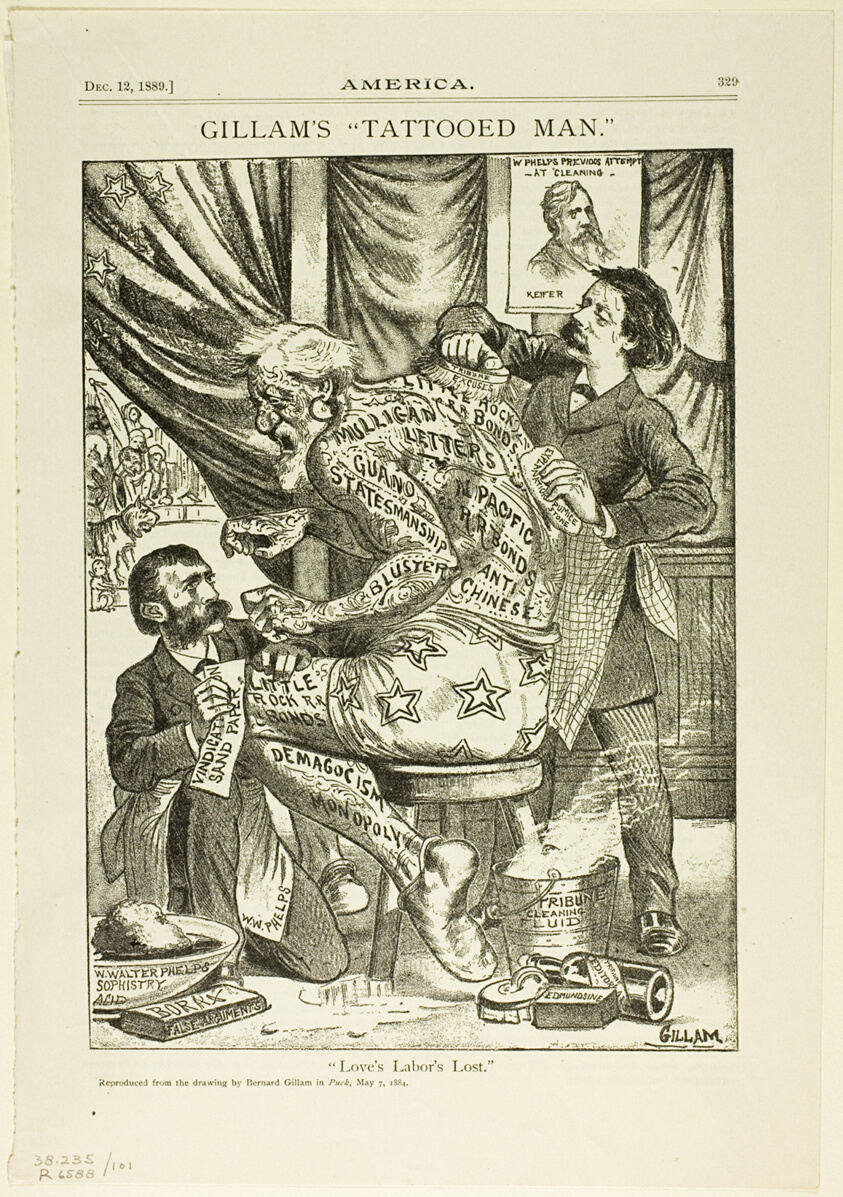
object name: Print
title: Love's Labor Lost, from America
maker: Bernard Gillam (American, 1856-1896)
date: published December 12, 1889, originally published in Puck on May 7, 1884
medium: Lithograph on newsprint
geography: United States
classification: lithograph; print; prints and drawing